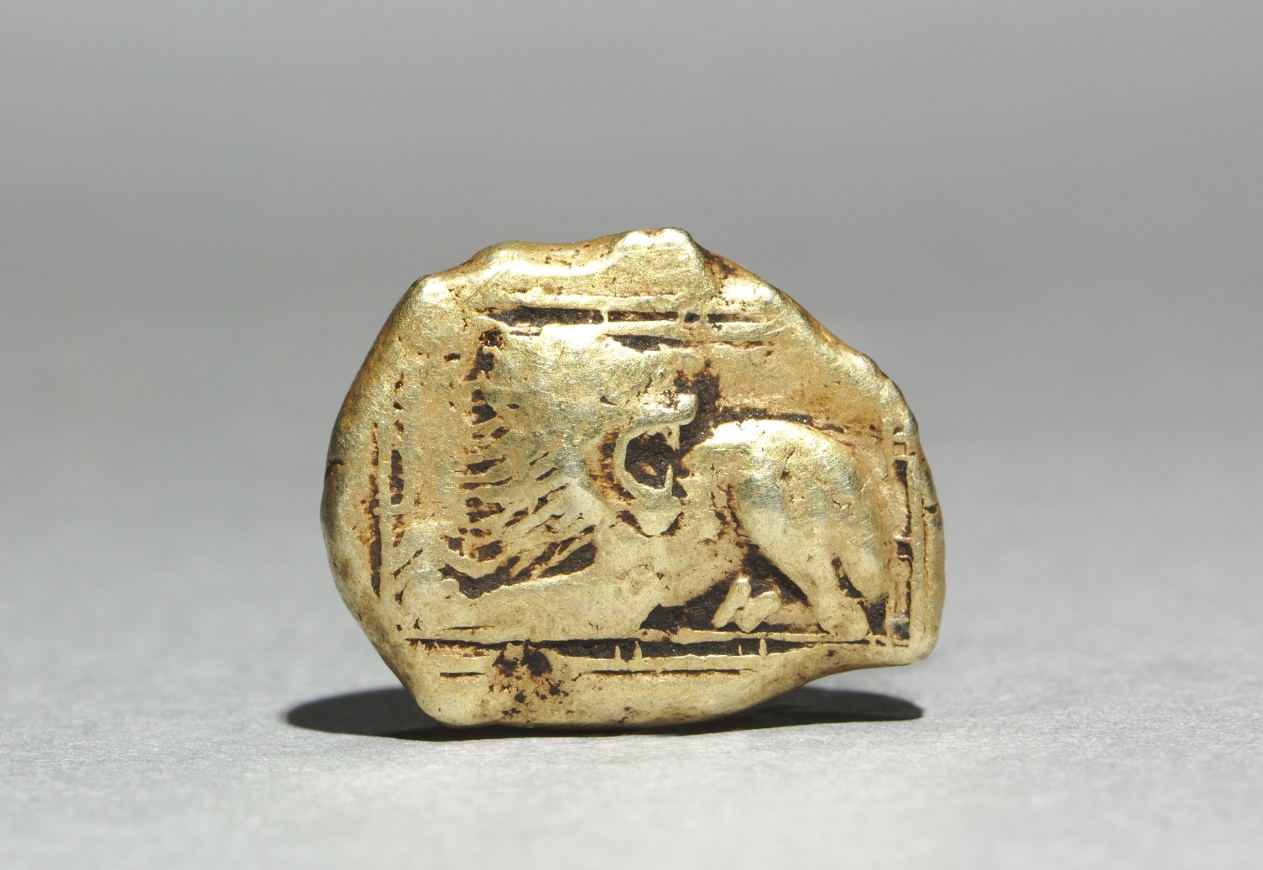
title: Stater: Lion, crouching, l., looking behind, within frame (obverse)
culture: Greek, minted at Miletos (Ionia)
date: 600–550 BCE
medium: Electrum (gold-silver alloy)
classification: Coins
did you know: Many early Greek coins are made from electrum, a naturally occurring alloy of gold and silver.